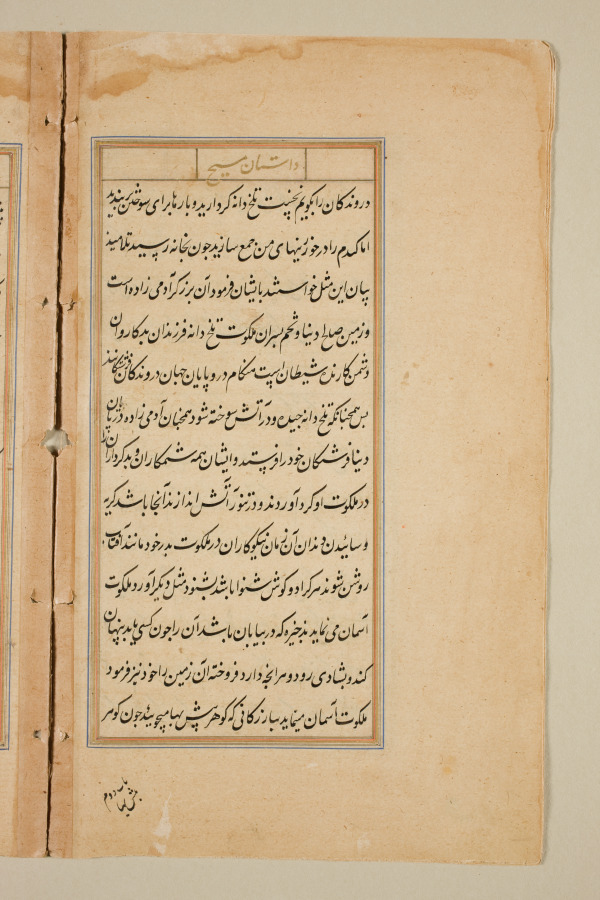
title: Text page from a Mirror of Holiness (Mir’at al-quds) of Father Jerome Xavier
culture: Mughal India, Allahabad, made for Prince Salim (1569–1627)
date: 1602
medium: Ink and gold on paper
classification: Manuscript